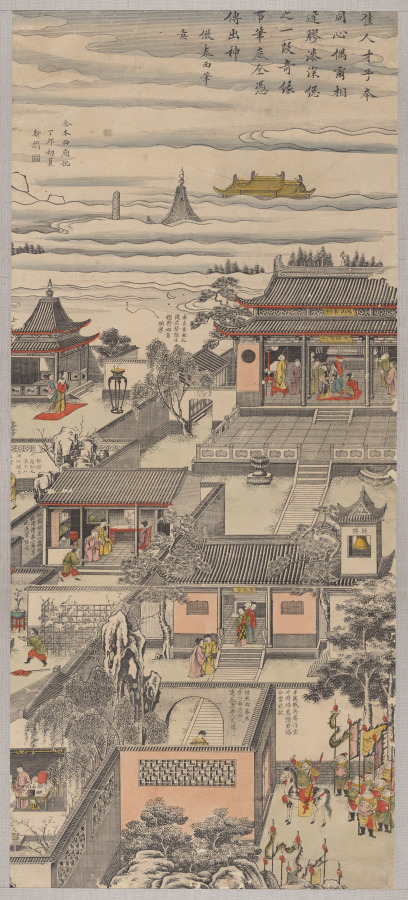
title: First Part of Story of The Western Chamber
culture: China, Qing dynasty (1644–1911), Qianlong reign (1736–95)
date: 1736–95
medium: Polychrome woodblock print; ink and color on paper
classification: Print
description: In the 1600s, printing flourished in such Jiangnan cities as Nanjing, Suzhou, Hangzhou, and Huizhou, evolving from privately enjoyed illustrated books printed in color to more commercialized single-sheet color prints that were hung on walls and became part of the rich urban visual culture.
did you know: Woodblock printing in color reached a height in China in the 1600s to 1700s. The prints were executed by means of sets of separate blocks, each carved to print a different color.